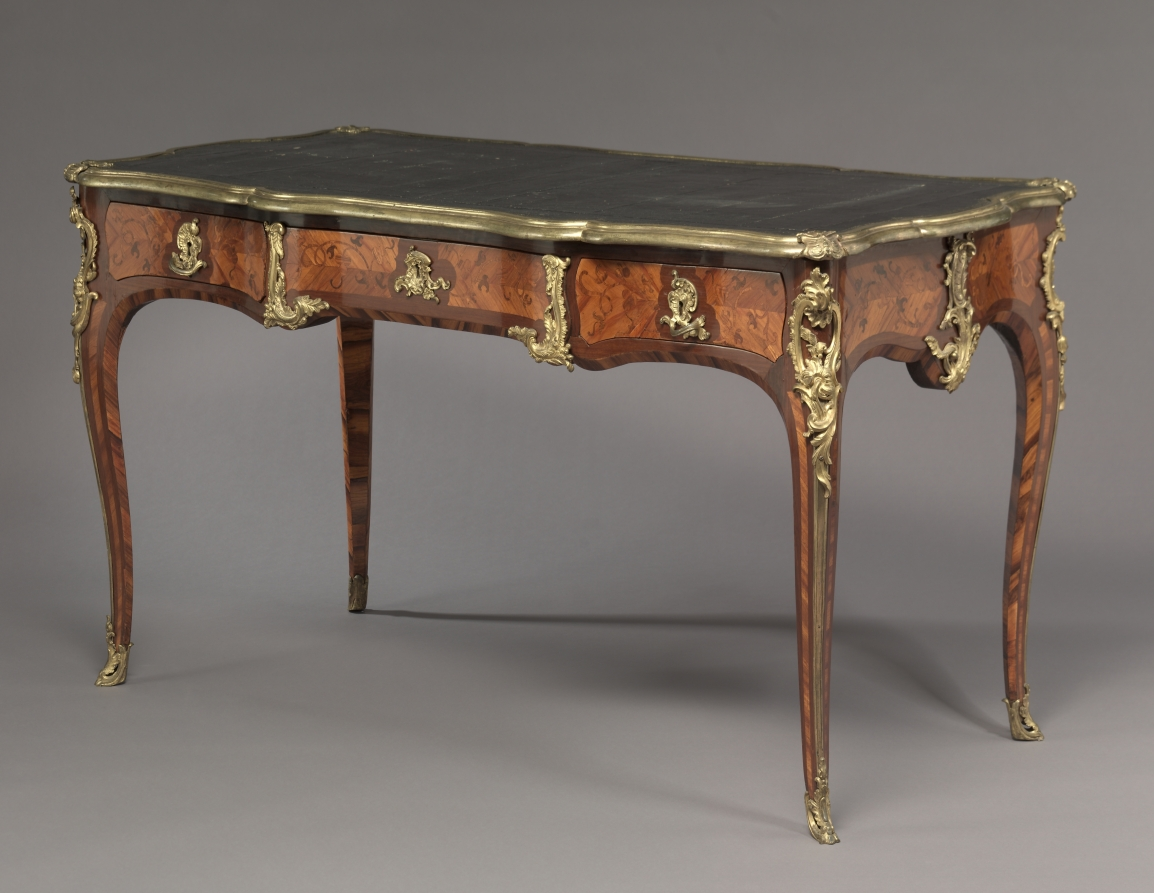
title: Table Desk (Bureau Plat)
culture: France, 18th century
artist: Bernard II van Riesen Burgh (Dutch, 1766)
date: c. 1750– 1760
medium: wood marquetry with gilt bronze mounts, leather top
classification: Furniture and woodwork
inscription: signed three times on bottom edge of apron: B. V. R. B.